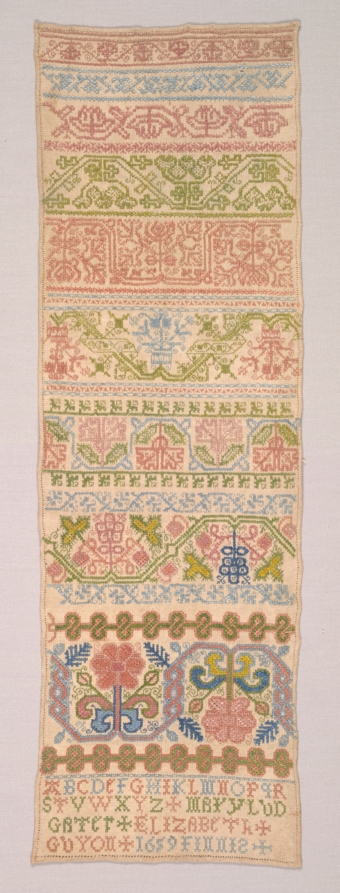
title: Long Sampler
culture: England, 17th century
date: 1659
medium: embroidery: silk on linen tabby ground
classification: Sampler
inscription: below: "ABCDEFGHIKLMNOPQR/ STVWXYZ MARY LUD/ GATER+ELIZABETH/ GUYON 1659 FINNIS."